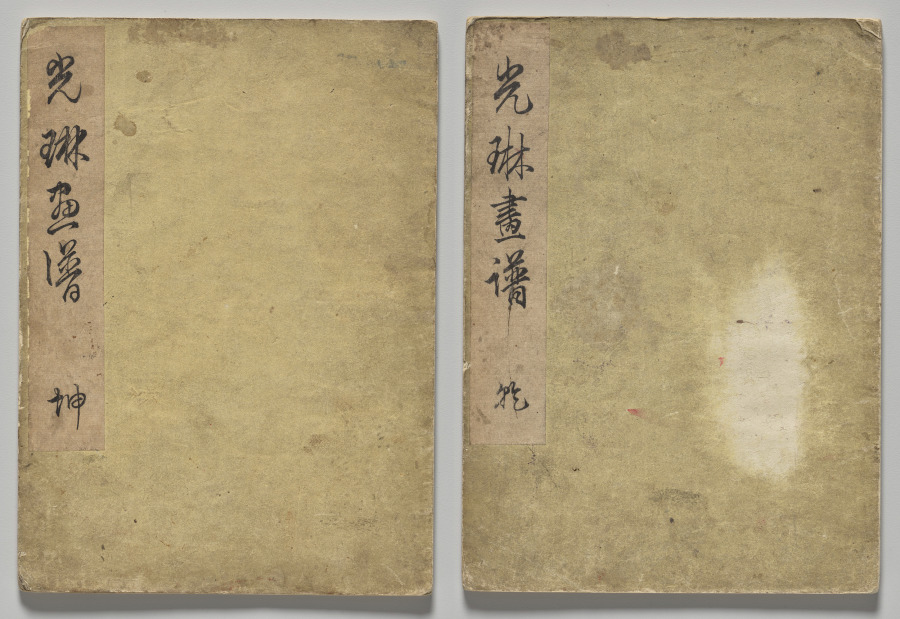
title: The Kōrin Picture Book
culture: Japan, Edo period (1615–1868)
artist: Nakamura Hōchū (Japanese, d. 1819)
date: 1800s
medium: Set of two woodblock printed folding-books; ink and color on paper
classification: Bound Volume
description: Nakamura Hōchū prized the design acumen of earlier painter Ogata Kōrin (1658–1716) and honored him with this two-volume set of woodblock printed images. While Hōchū sampled the original compositions from Kōrin’s works, the prints in these books are heavily inflected with his own loose, whimsical drawing style.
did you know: This set of books is in the orihon, or folding-book format.